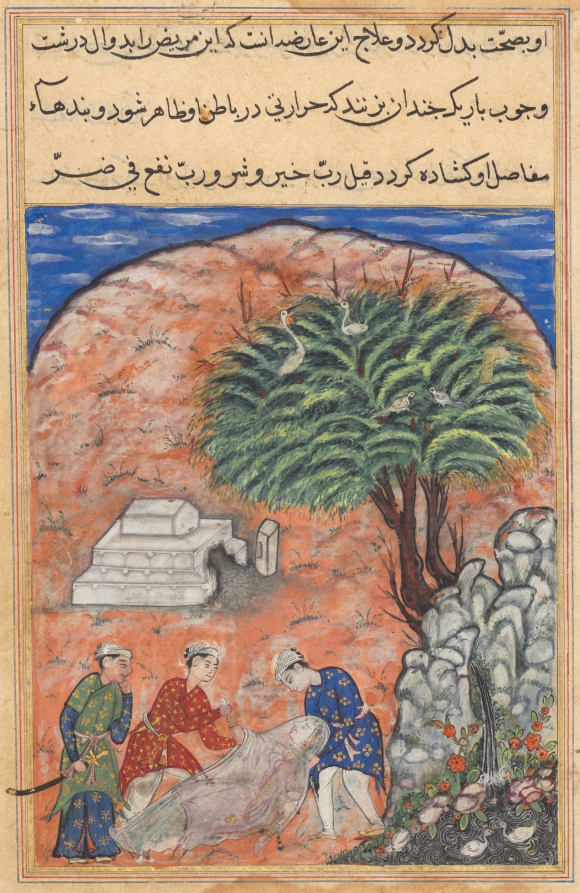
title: The suitors take the devotee’s daughter out of her tomb after breaking it open, when the physician discovers she is still alive, from a Tuti-nama (Tales of a Parrot): Twentieth Night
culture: Mughal India, court of Akbar (reigned 1556–1605)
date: c. 1560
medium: gum tempera, ink, and gold on paper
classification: Painting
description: The three suitors hold the lifeless body of the woman they intended to marry. She is wrapped in a diaphanous burial shroud, and her tomb stands empty in the background. When the suitors realize that the woman is not dead, they proceed to attempt to revive her.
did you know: The three pairs of birds in the tree and pond allude to the three suitors.